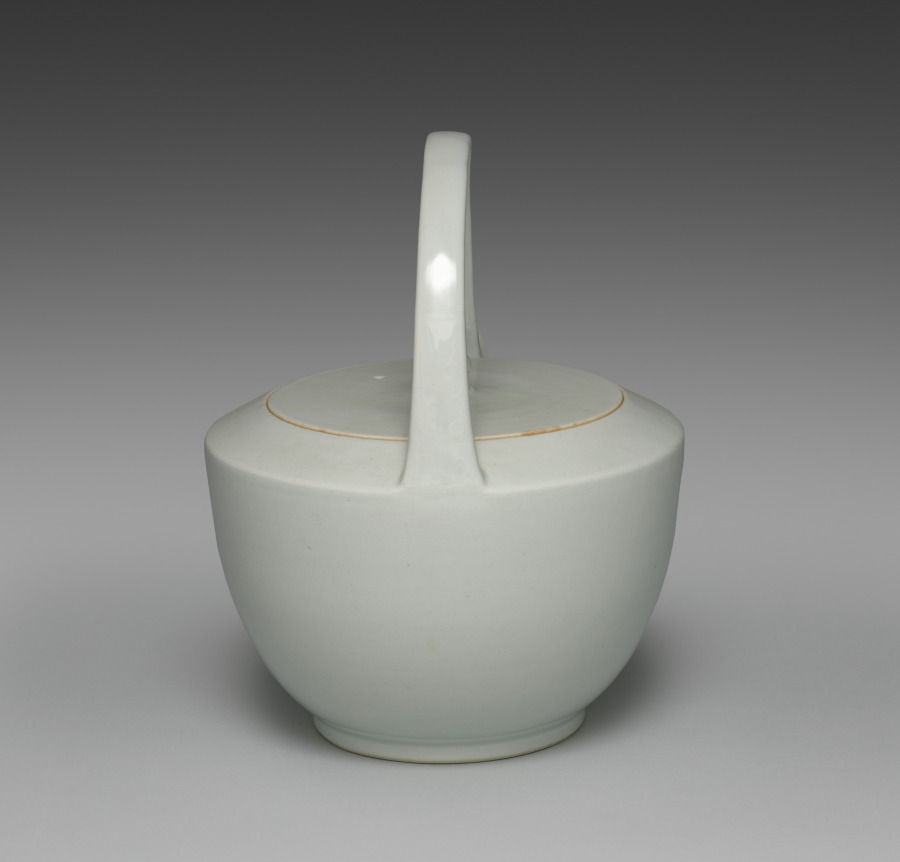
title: Sake Pourer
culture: Japan, Meiji period (1868–1912)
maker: Seifū Yohei III (Japanese, 1851–1914)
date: c. 1887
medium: Porcelain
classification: Ceramic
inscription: Artist's signature in underglaze blue on the base.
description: This sake pourer has a wide basin with a low foot; a generous spout open across the top half; a flat, round lid with a small knob recessed flush to the top of the container; and a tall, arched handle that meets the container where the top joins the basin at a sharp angle. This vessel is glazed but otherwise undecorated. Unlike the creamy white color of some Yohei III works, the white of this sake pourer has the bluish cast typical of porcelains produced in Kyoto.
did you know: Seifū Yohei III signed this sake pourer in underglaze blue on the base.